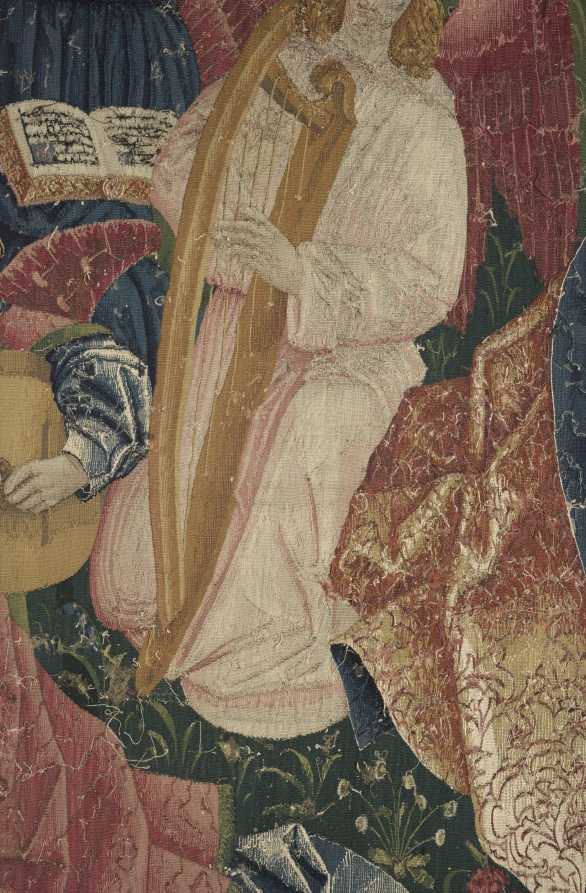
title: The Triumph of Eternity (from Chateau de Chaumont set)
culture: France, Lyon(?), early 16th century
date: 1512–15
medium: silk and wool; tapestry weave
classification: Tapestry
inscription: French verse in Gothic letters translates as follows: "Nothing triumphs by right authority, Unless it be conducted by Eternity. Nothing is permanent beneath the firmament, But above us triumphs Eternity."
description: The Triumph of Eternity is represented by the Coronation of the Virgin. Dressed in crimson velvet with an opulent brocaded velvet shawl, the Virgin is seated in the center as two angels hold a crown over her head. Five musical angels surround her playing an organ, recorder, straight cornetto, harp, and lute, while another sings from an open music book. The scenes in the set display a conservative style in which the figures are placed in shallow landscapes, thereby ignoring pictorial innovations for depicting space and mass. The verse in Old French at the top states: Nothing triumphing by due authority Remains permanent and durable. Nothing is permanent under the heavens, But above, eternity triumphs.